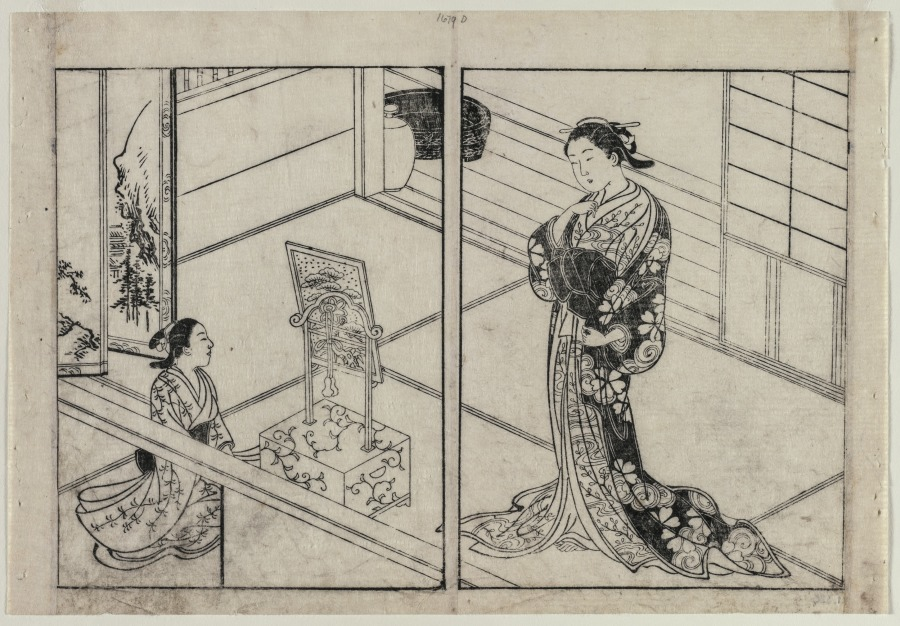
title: Woman and Child Beside a Mirror Stand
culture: Japan, Edo period (1615–1868)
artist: Nishikawa Sukenobu (Japanese, 1671–1754)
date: c. 1740s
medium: color woodblock print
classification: Print